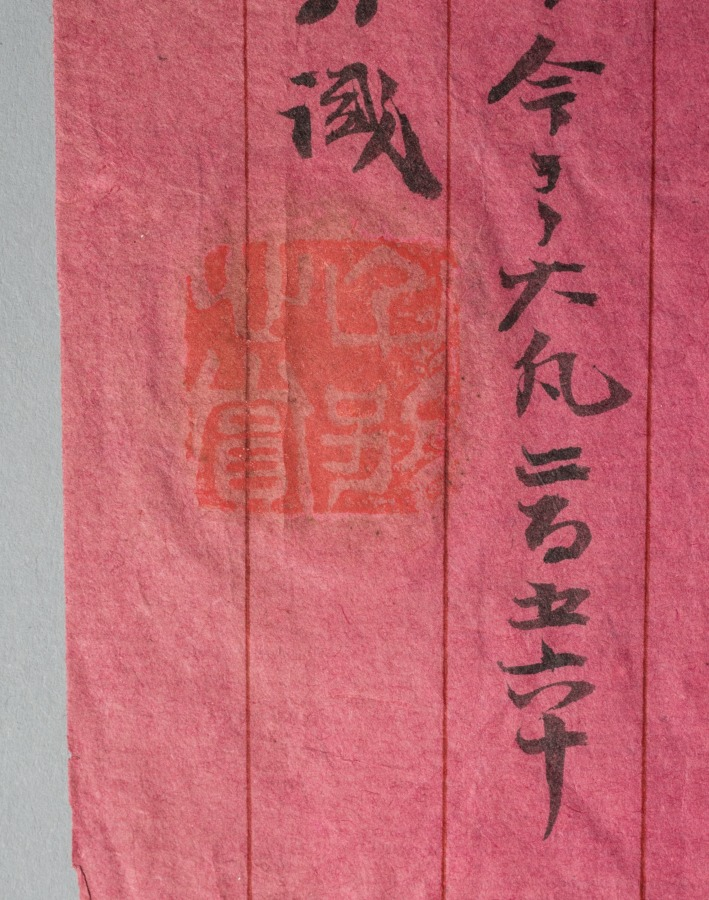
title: Courtesan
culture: Japan, Edo period (1615–1868)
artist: Matsuno Chikanobu (Japanese, active 1716–35)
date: 1716–35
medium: hanging scroll; ink and color on paper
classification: Painting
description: A glamorous courtesan sports an outer robe decorated with large roundels featuring plant motifs including iris and bush clover. Little is known about the life and artistic training of the painter Matsuno Chikanobu, an ukiyo-e artist who painted in a style strongly reminiscent of that of the Kaigetsudō studio. Many of his known paintings are on silk, and executed with high quality pigments, indicating that his primary clientele were wealthy individuals.